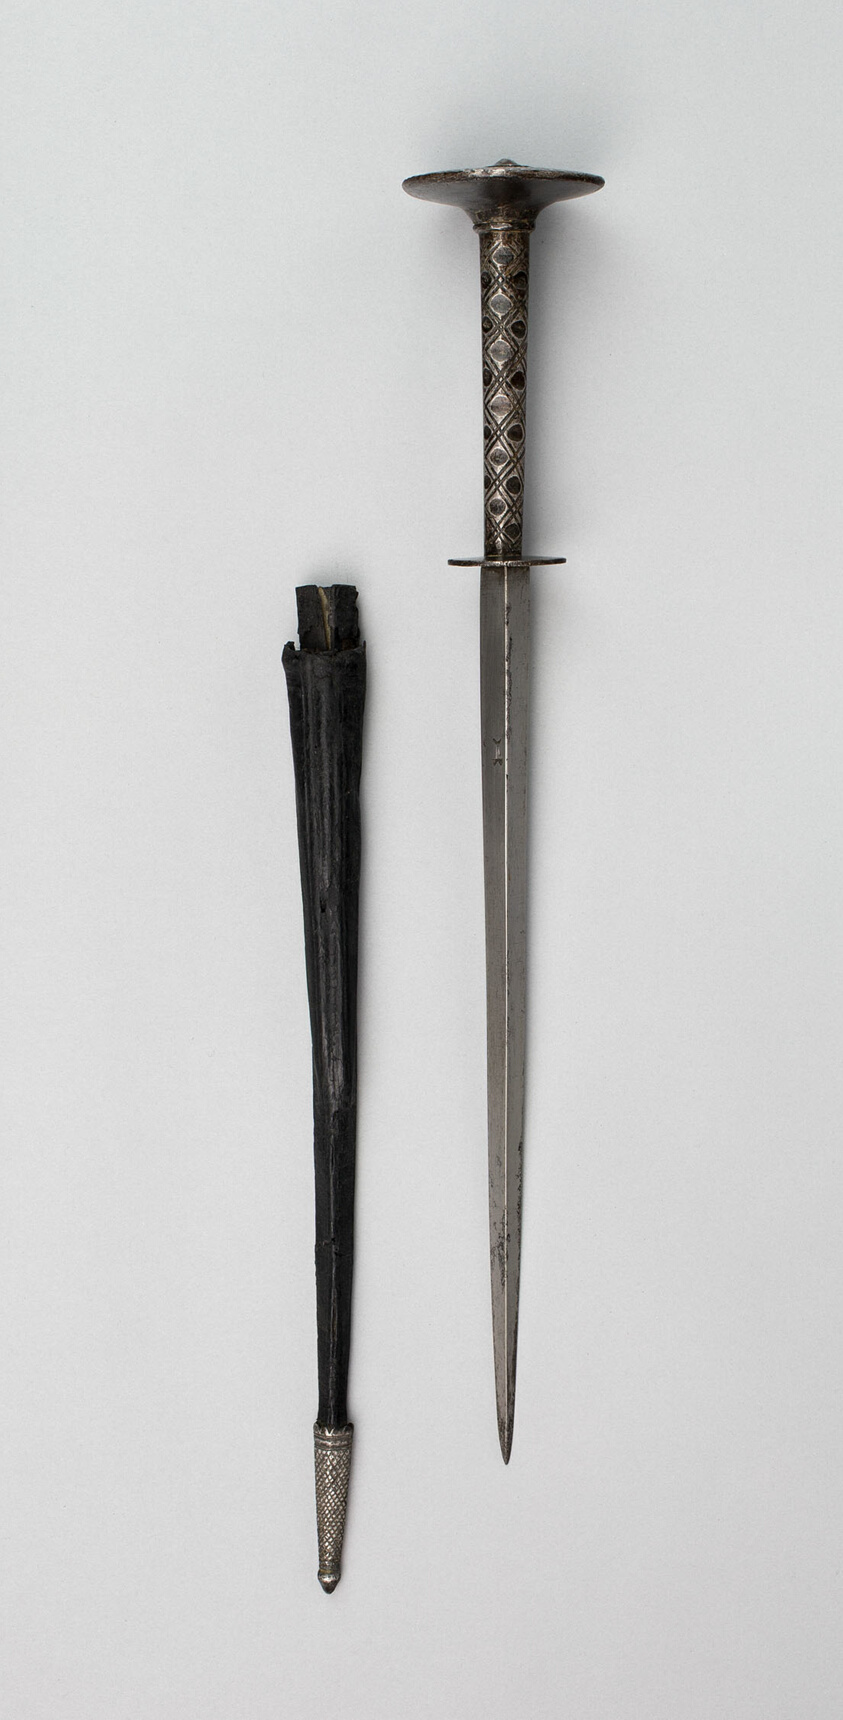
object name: Arms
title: Roundel Dagger and Scabbard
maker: German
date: 1500/20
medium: Steel, leather, and iron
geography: Saxony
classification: edged weapon-dagger; arms; arms and armor